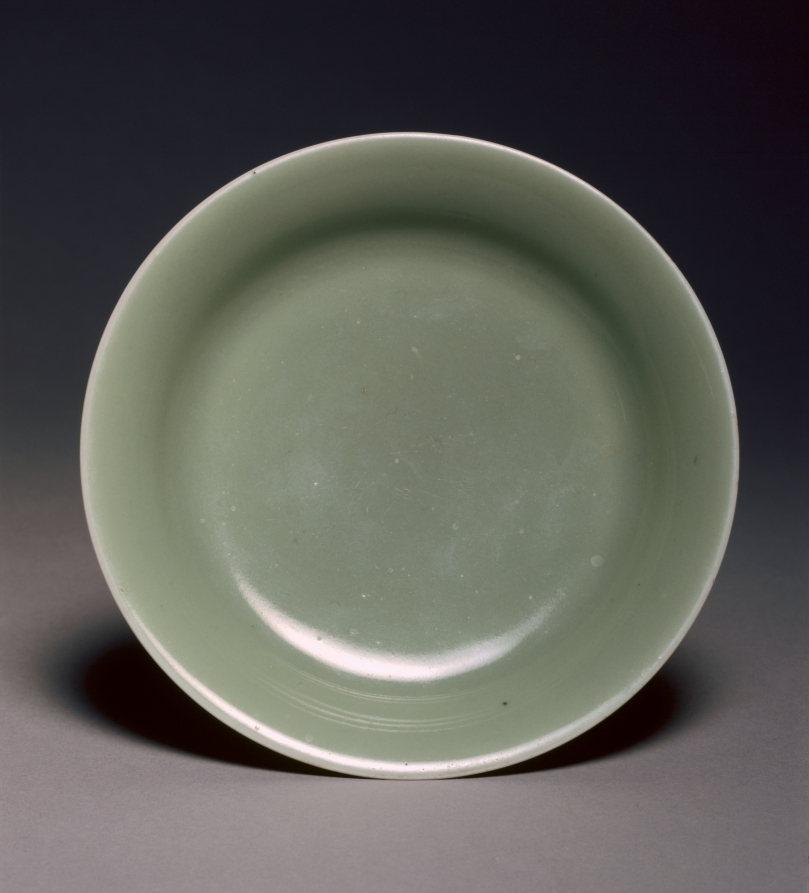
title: Plate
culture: China, Qing dynasty (1644–1911), Qianlong reign (1736–95)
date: 1736–95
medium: porcelain, with celadon glaze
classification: Ceramic